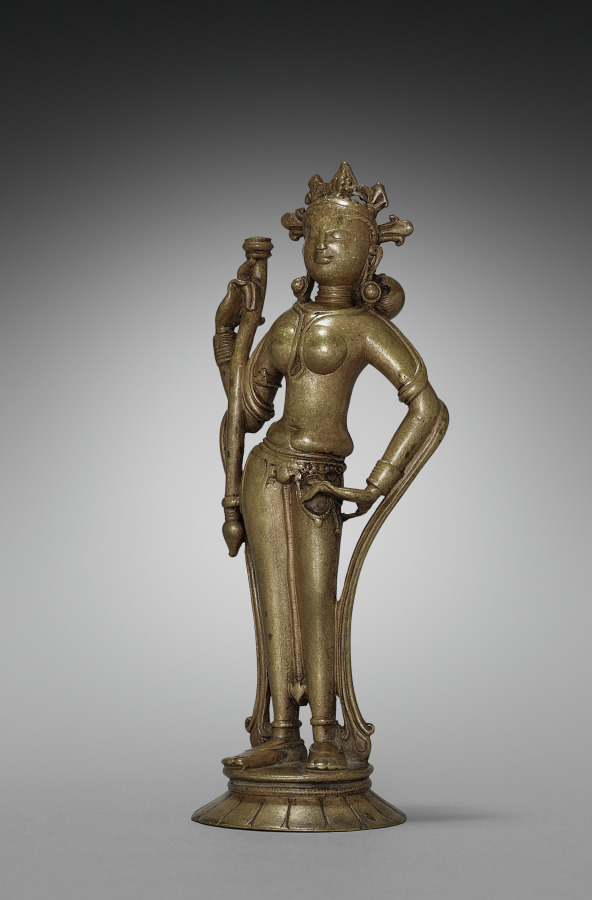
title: Standing Devi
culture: India, Ladakh, 12th century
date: 1100s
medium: brass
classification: Sculpture